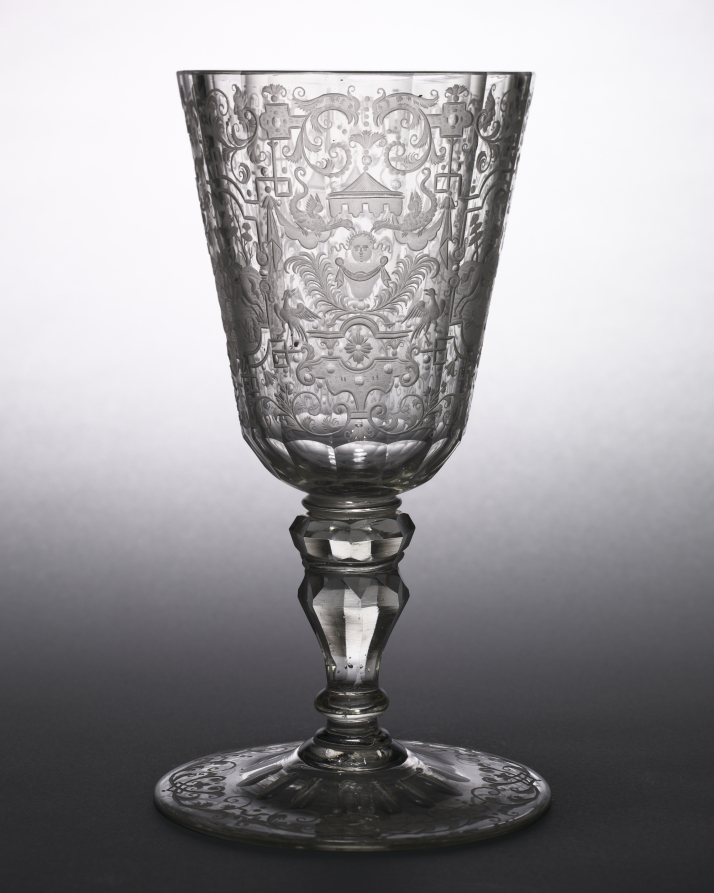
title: Cup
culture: Bohemia, 18th century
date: c. 1720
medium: glass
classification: Glass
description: This substantial drinking vessel was used for a variety of alcoholic beverages. Bohemian glass gained immense popularity throughout Europe’s courts in the late 1600s and early 1700s. Bohemia (present-day Czech Republic) had abundant natural resources, including potassium-rich minerals that, when combined with chalk, created clear glass that was remarkable for its stability. Glassmakers from the region became experts at hand cutting and engraving glassware, as in this example featuring a boar hunt amid elaborate ribbonlike motifs, or strapwork, and floral designs.